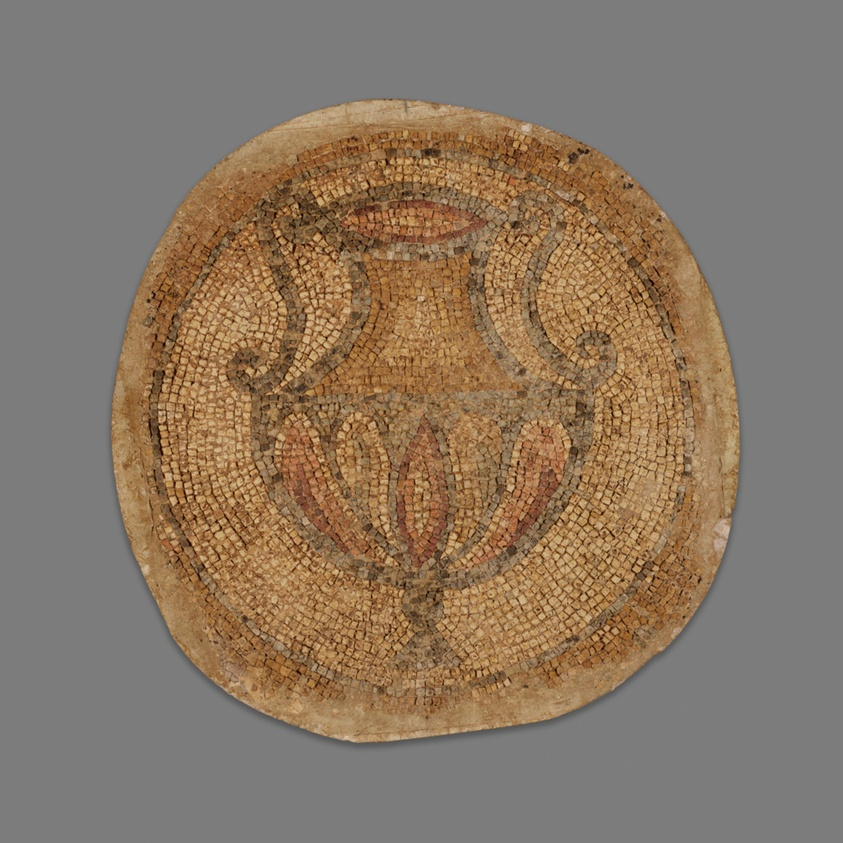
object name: Architectural fragment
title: Mosaic Fragment with Classical Vase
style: roman (ancient, style or period), ancient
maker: Late Roman; probably Eastern Mediterranean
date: 4th-5th century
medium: Stone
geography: Italy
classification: mosaic; ancient art; architectural fragment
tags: vases